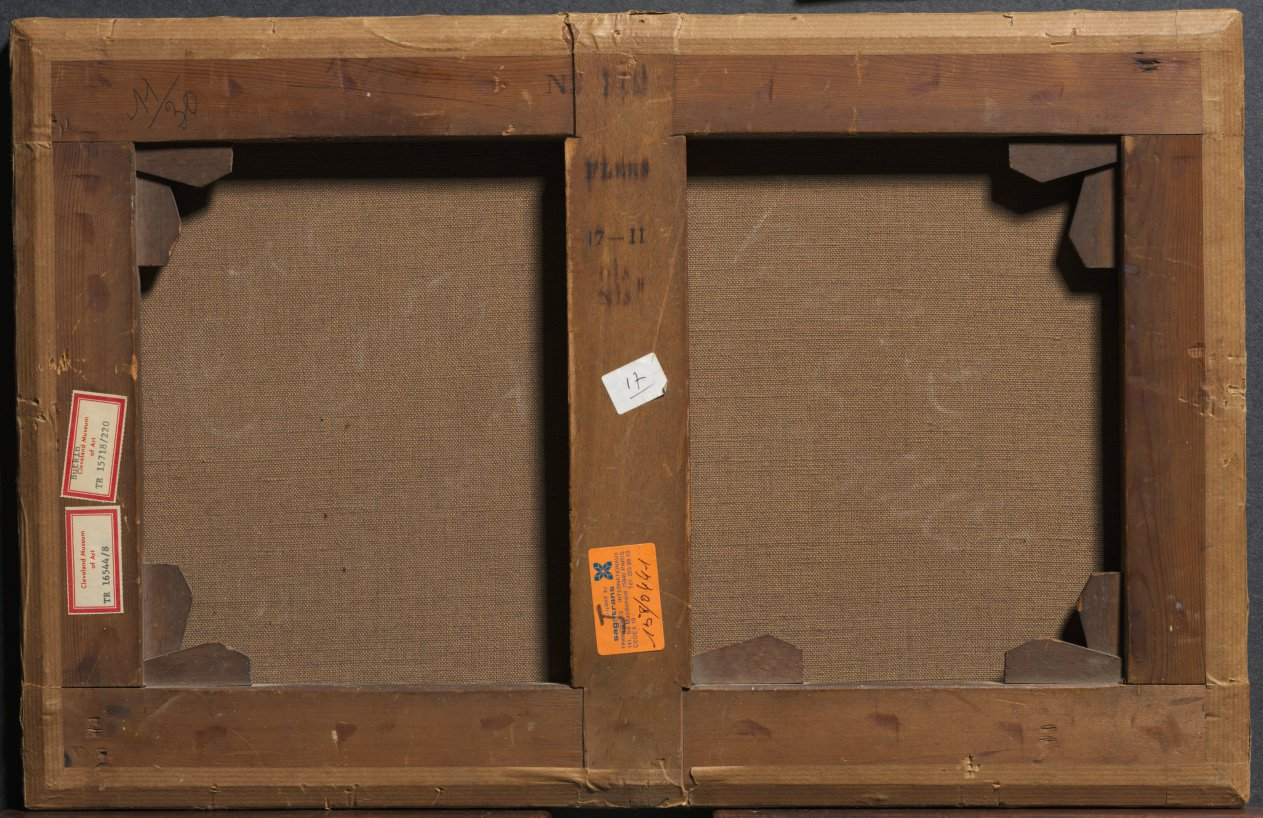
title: Cottage by the River with Washerwomen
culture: France, 19th century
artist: Camille Flers (French, 1802–1868)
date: 1835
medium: oil on fabric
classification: Painting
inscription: Signed lower right: Flers / 1835